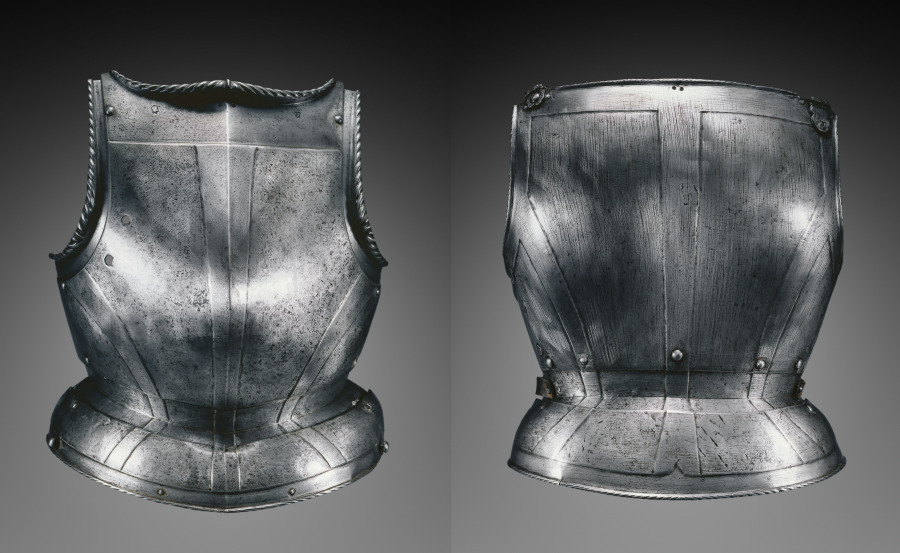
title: Breast and Backplate from an Armor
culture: Germany, Landshut, mid-16th century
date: mid-1500s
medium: steel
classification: Arms and Armor